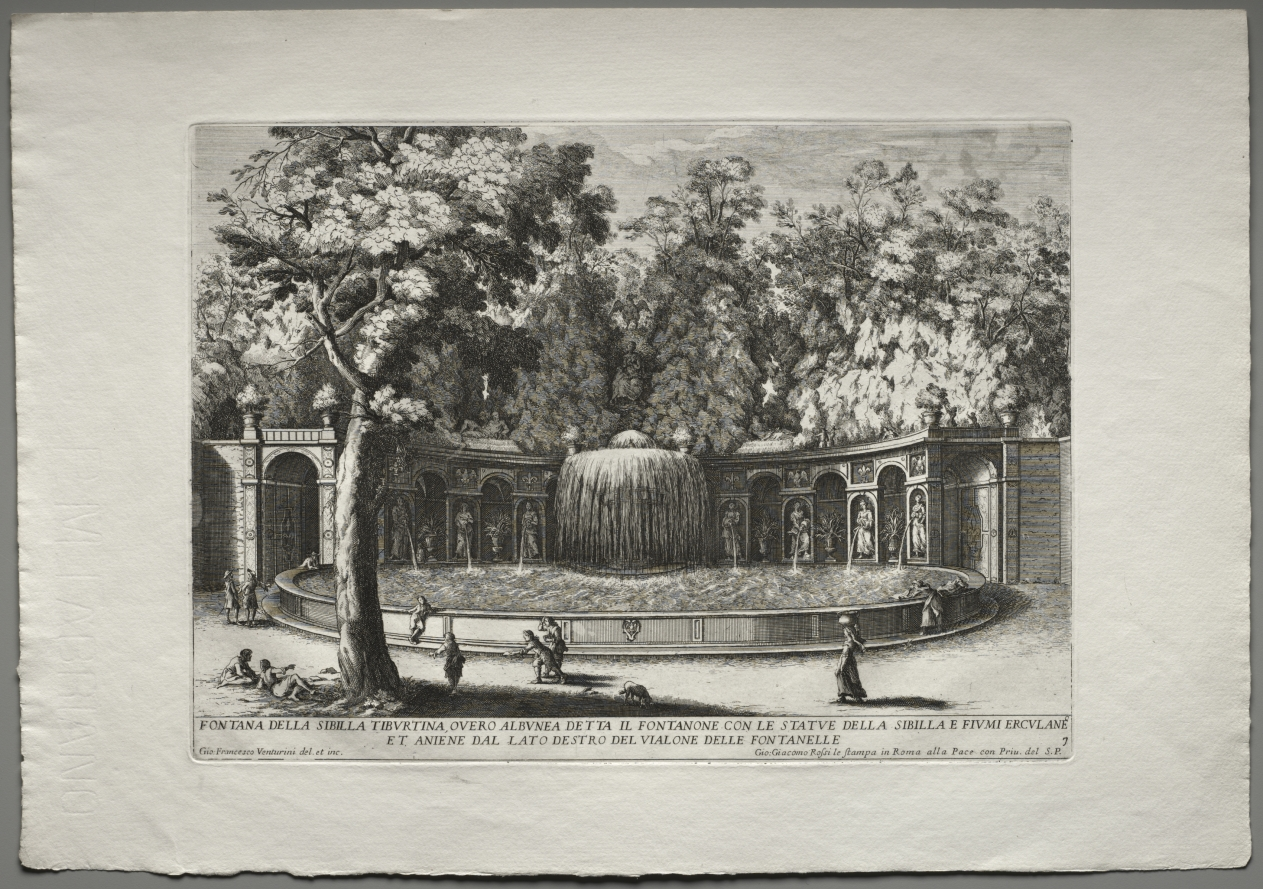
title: The Fountains of Rome (Le fontane di Roma), Book IV, plate 7: Fountain of the Tiburtine Sibyl (Fontana della Sibilla Tiburtina)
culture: Italy, 17th century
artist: Giovanni Francesco Venturini (Italian, 1650–1710)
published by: Stamperia Giovanni Giacomo de Rossi (Italian, 1600–1750)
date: 1676–1700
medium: etching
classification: Print